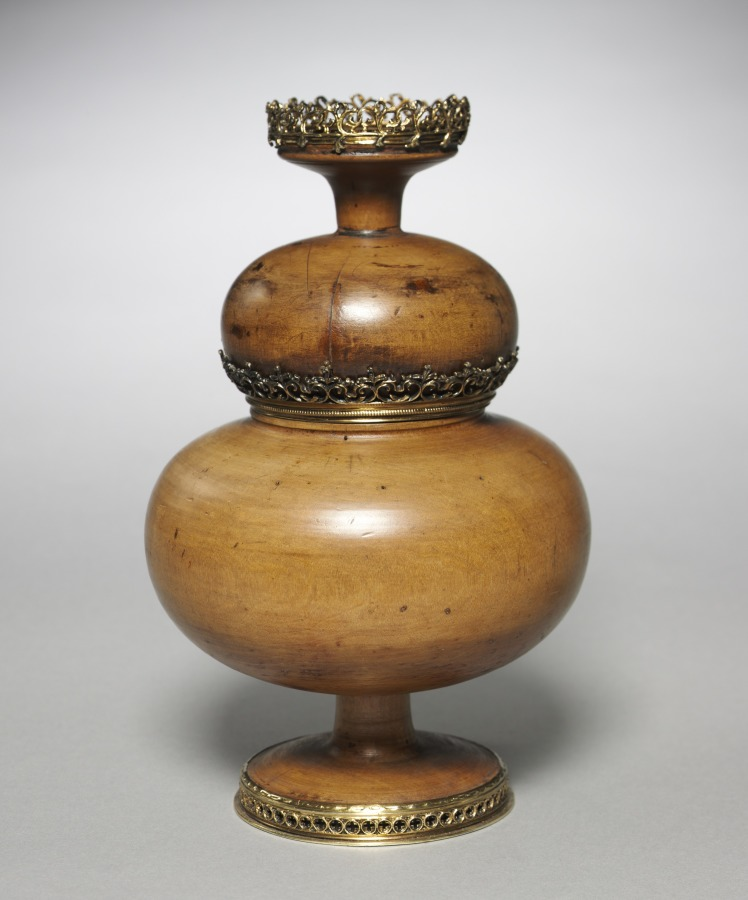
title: Double Cup (Mazer)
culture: Germany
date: c. 1530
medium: maple wood with gilt-silver mounts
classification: Wood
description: A characteristic form of drinking vessel made of close-grained wood, especially maple, was developed in Germany as early as the thirteenth century. It consisted of a larger cup with a foot and a handle and a smaller cup on top. The upper one served as a lid but could also be removed and used as a separate drinking vessel. In this example the smaller upper cup is inset with a memorial portrait medallion of Albrecht Dürer made in the year of his death, 1528. The medal is the work of Matthes Gebel who was active in Nuremberg and Augsburg as a medallist from 1523 to his death in 1574. The reverse of the medal is set into the base of the larger lower cup.